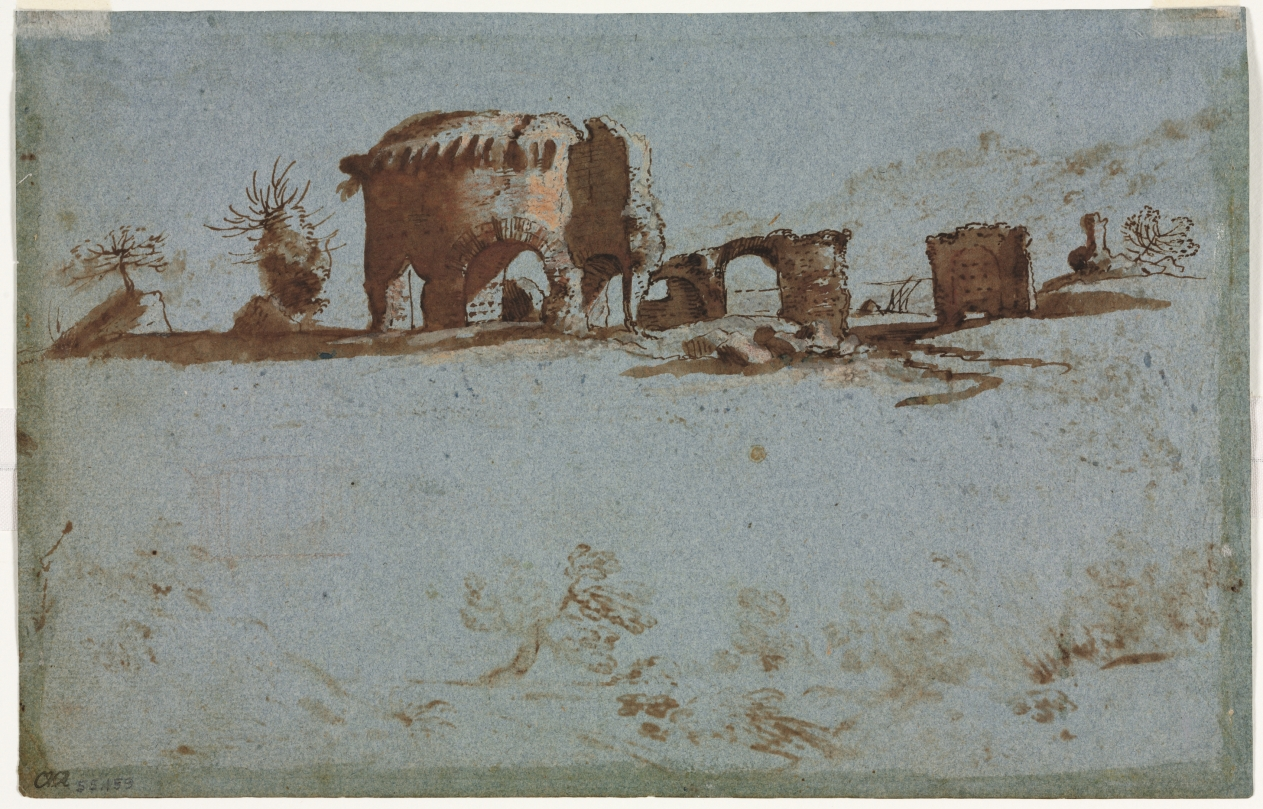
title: Small Group of Roman Ruins (verso)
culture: Italy, 17th century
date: c. 1650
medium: pen and brown ink and brush and brown wash with red chalk, heightened with white and orange gouache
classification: Drawing